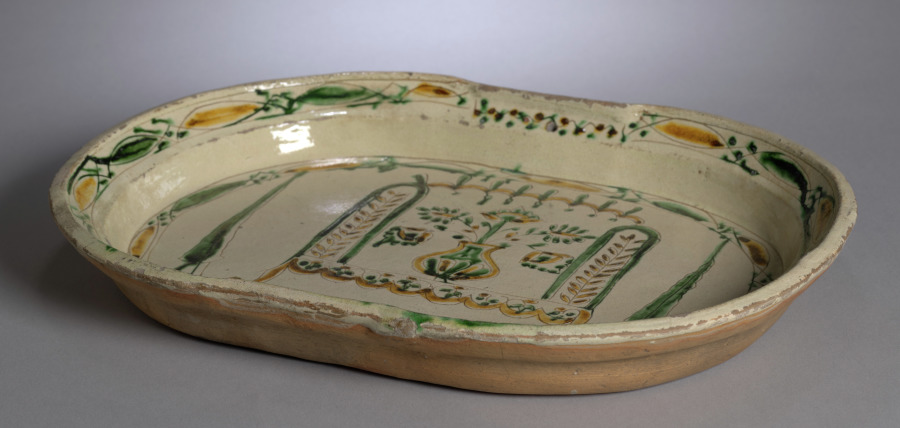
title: Shaving Bowl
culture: Mexico, Guanajuato, 19th century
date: c. 1830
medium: pottery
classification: Ceramic